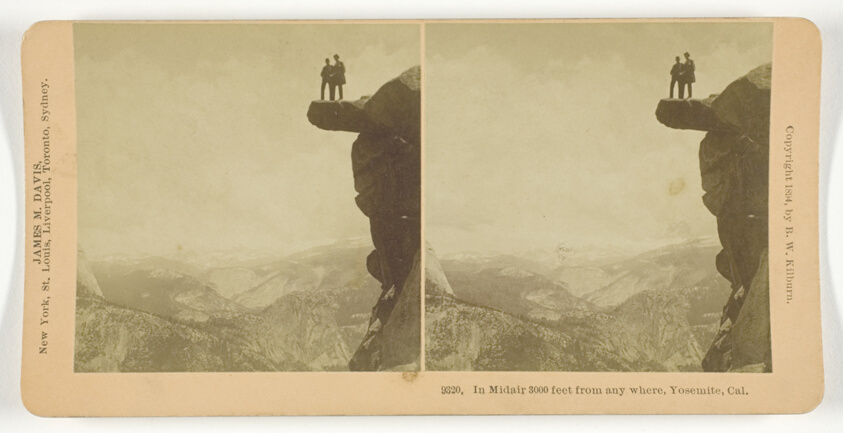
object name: Photograph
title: In Midair 3000 feet from anywhere, Yosemite, Cal.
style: 19th century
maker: B. W. Kilburn; American, 1827–1909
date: 1894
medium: Albumen silver print, stereo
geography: United States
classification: stereograph (albumen); albumen silver print; photographic process; photography; photograph